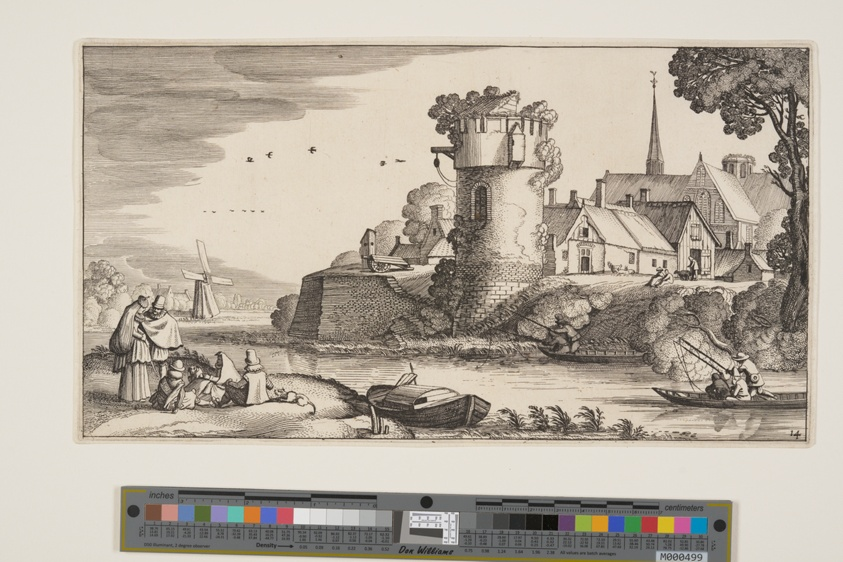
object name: Print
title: Watch-Tower by a River, from Landscapes (Playsante Lantschappen)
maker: Attributed to Claes Jansz. Visscher II (Dutch, 1586-1652); after Jan van de Velde II (Dutch, c. 1593-1641)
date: c. 1641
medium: Etching, with engraving, on ivory laid paper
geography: Netherlands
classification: etching; paper; print; prints and drawing